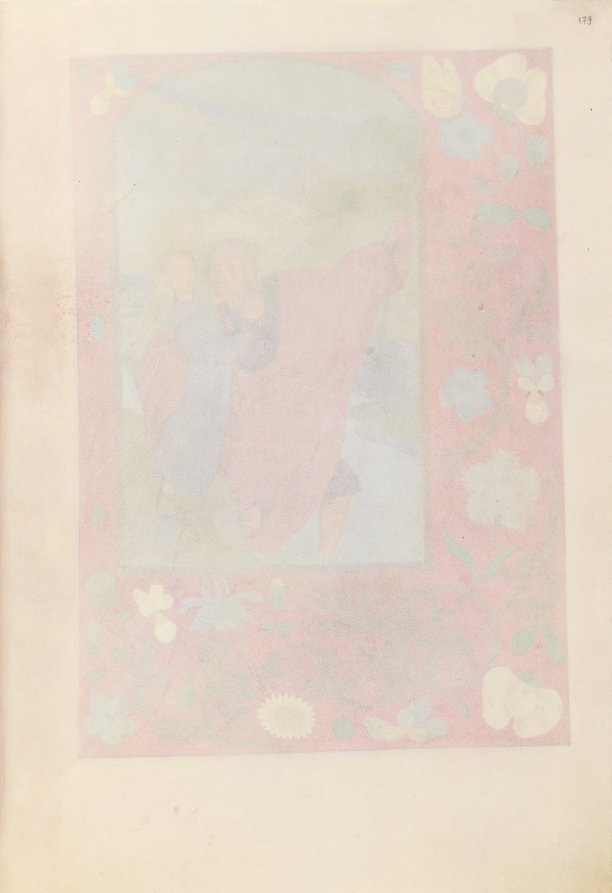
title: Hours of Queen Isabella the Catholic, Queen of Spain: Fol. 179r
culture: Flanders, Ghent and Bruges, late 15th century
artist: Master of the First Prayerbook of Maximillian (Flemish, c. 1444–1519)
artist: and Associates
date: c. 1500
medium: ink, tempera, and gold on vellum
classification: Bound Volume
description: This manuscript was illuminated by a circle of at least five highly organized manuscript painters active in the Flemish cities of Ghent and Bruges. The principal illuminator was Alexander Bening, who painted the majority of the book's miniatures. Manuscripts produced by this circle of artists are renowned for the decoration of their borders, which typically feature a rich variety of realistically-painted flowers, birds, and butterflies. This prayer book, called a book of hours, was intended not for a cleric, but for the private devotions of a lay person-in this case, Isabella the Catholic, Queen of Spain (1451-1504). Isabella's coat of arms embellishes the book's frontispiece. It is unlikely that the book was commissioned by the Queen herself; rather, she probably received it as a diplomatic gift from someone courting her patronage, perhaps Cardinal Francisco Jimenez de Cisneros. A Franciscan friar, Jimenez was dependent upon Isabella for his advancement, first to the post of Queen's confessor in 1492, and then to Archbishop of Toledo in 1495.